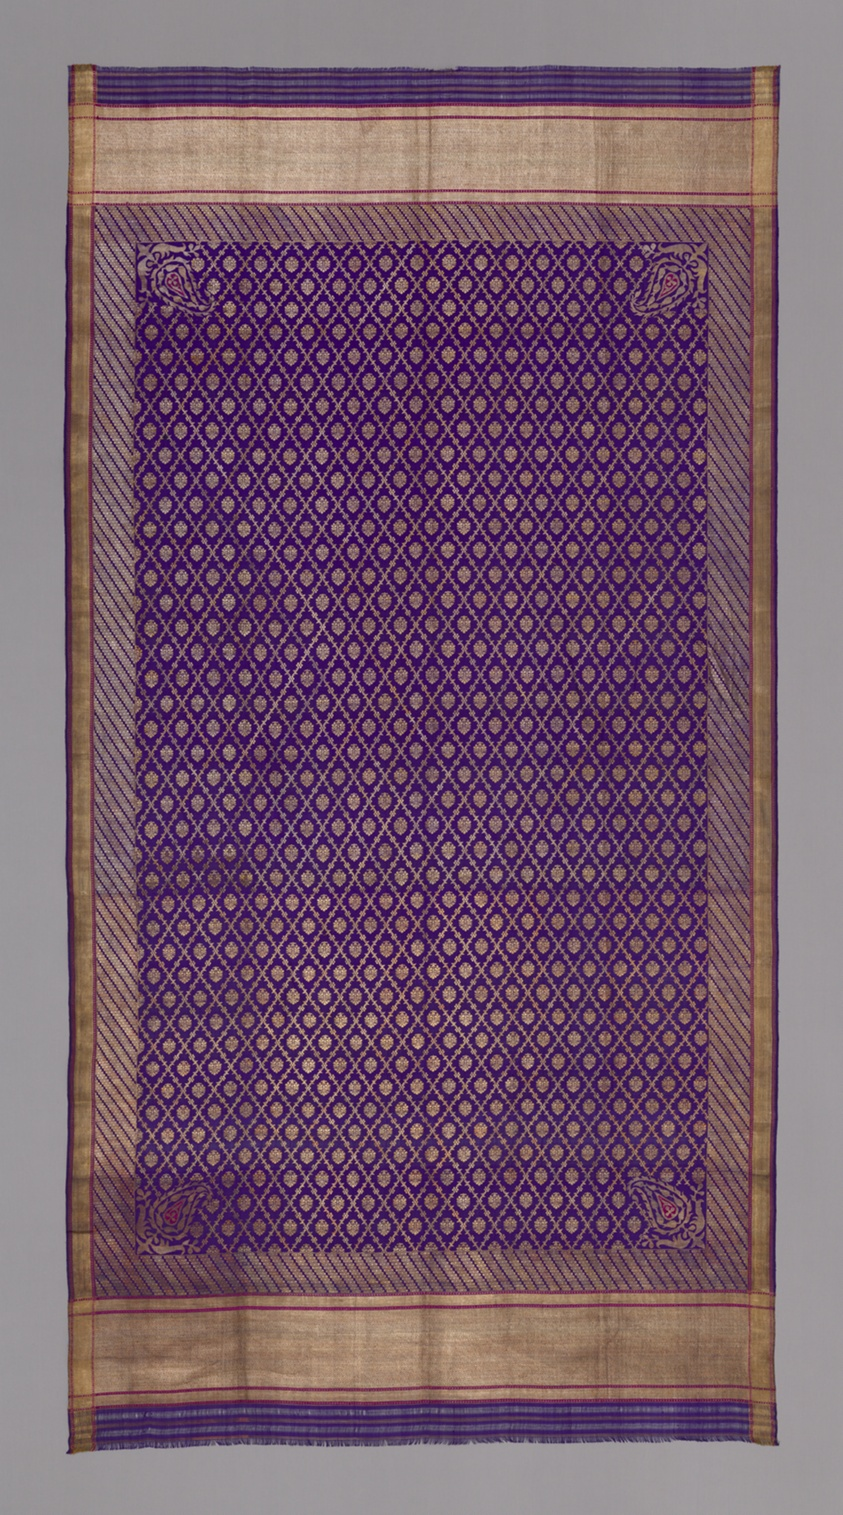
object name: Costume and Accessories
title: Scarf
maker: Eastern India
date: 19th century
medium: Silk, plain simple cloth, semi-transparent brocaded with gold wound on yellow silk core; stripes and four corner motifs of red silk and border of gold warp along selvages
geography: India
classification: textile; costume; dress (garment); clothing